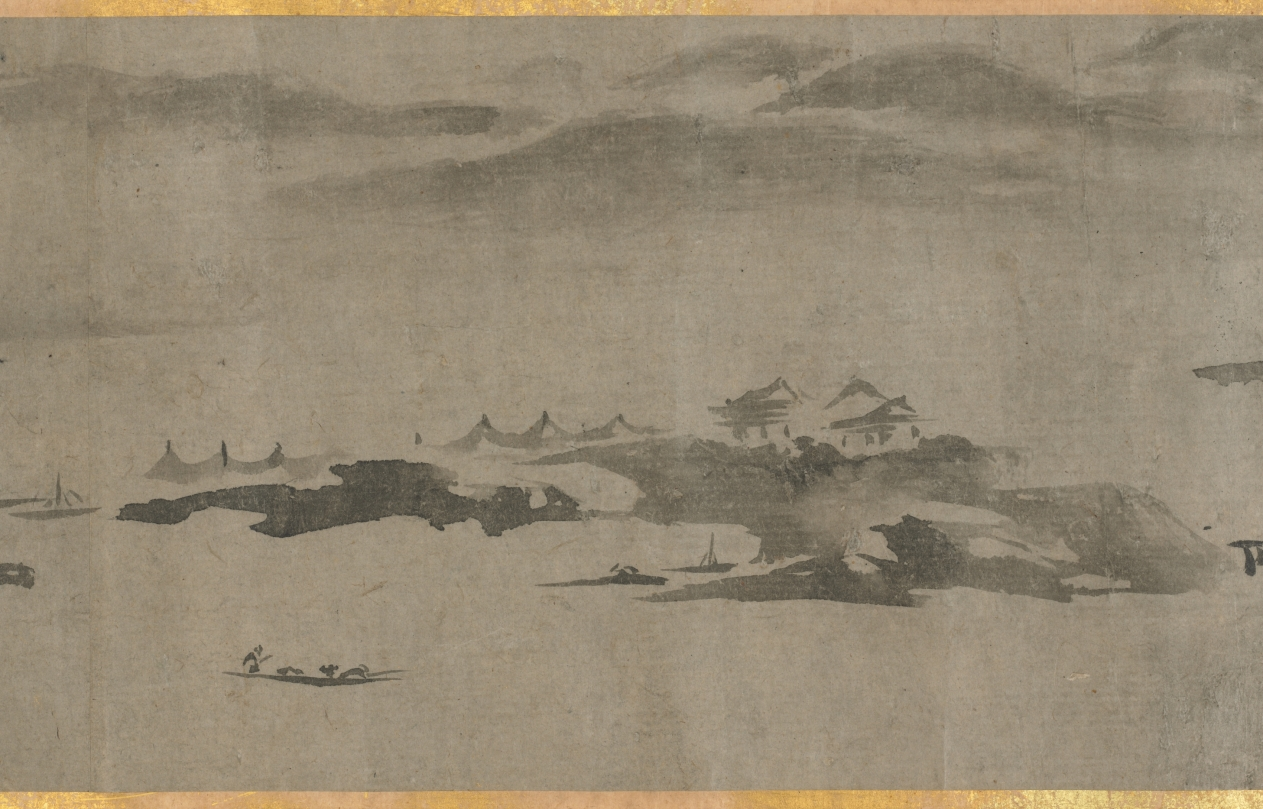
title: Eight Views of Xiao-Xiang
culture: Japan, Muromachi period (1392–1573)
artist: Sesson Shūkei (Japanese, c. 1492–c. 1577)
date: 1500s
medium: handscroll; ink on paper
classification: Painting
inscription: Signature and seal of artist at end of painting.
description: Eight Views of the Xiao and Xiang Rivers can be traced to 11th-century Chinese poems and paintings, the depiction of which had also become popular among Korean and Japanese painters. Xiao-Xiang refers to the region in present-day Hunan province where the Xiao and Xiang rivers converge. Few painters of the Eight Views had in fact seen the scenery; rather, they were trying to portray in ink and wash the lyrical qualities of dim light and a misty atmosphere typical of that region. Each of the poetic titles suggests a time of day, a season, or specific atmospheric conditions—subjects that challenged the abilities of the most talented artists. In this miniature painting (shukuzu) of the Muromachi period, Japanese Zen monk and painter Shukei Sesson depicted all eight views featured in Chinese prototypes: Wild Geese Descending to Sandbar; Returning Sails Off a Distant Coast; Mountain Market in Clearing Mist; River and Sky in Evening Snow; Autumn Moon over Dongting Lake; Night Rain on the Xiao and Xiang; Evening Bell from Mist-Shrouded Temple; and Fishing Village in Evening Glow.